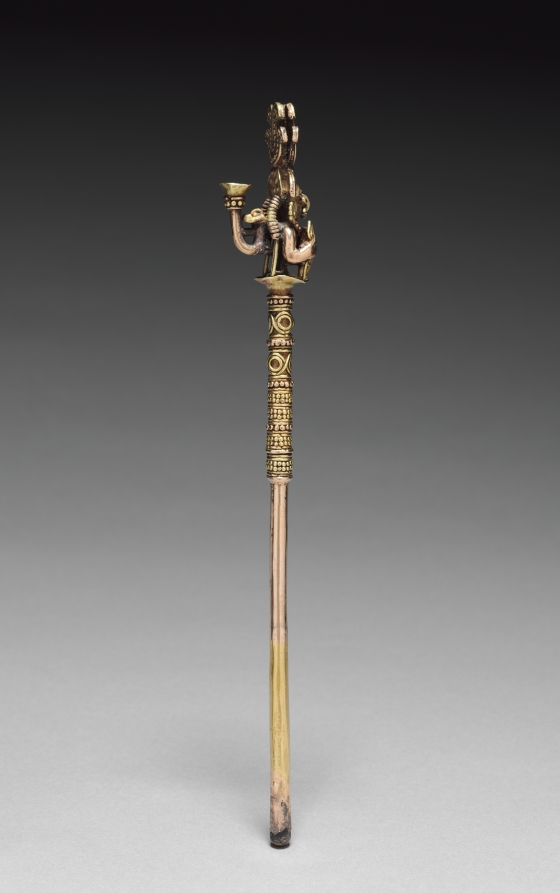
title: Lime Dipper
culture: Colombia, Calima region, Yotoco style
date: c. 1–800 CE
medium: gold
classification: Metalwork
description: Coca-leaf chewing was a widespread ritual in ancient South America. Utensils included a container and a dipper or spoon for powdered lime (made from seashells), added to the coca to enhance its gentle, stimulating effect. Colombian cultures are especially known for transforming these utensils into works of art made of precious metal. The image on the tallest dipper is wonderfully complex. A serpent coils at the bottom, beneath a snarling animal with a huge, vertical tail. This animal has a tiny monkey on its back; the monkey also has a huge tail, which rests on the first animal's head like a headdress. This intricate image was created with the lost-wax casting process.